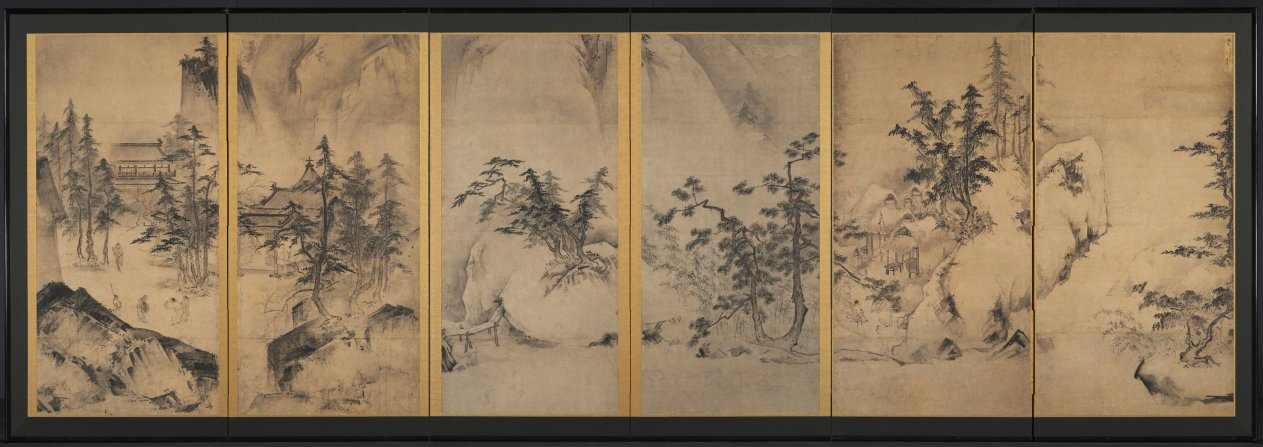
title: Winter and Spring Landscape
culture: Japan, Muromachi period (1392–1573)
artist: attributed to Tenshō Shūbun (Japanese)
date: early to mid-1400s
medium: Six-panel folding screen; ink and slight color on paper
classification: Painting